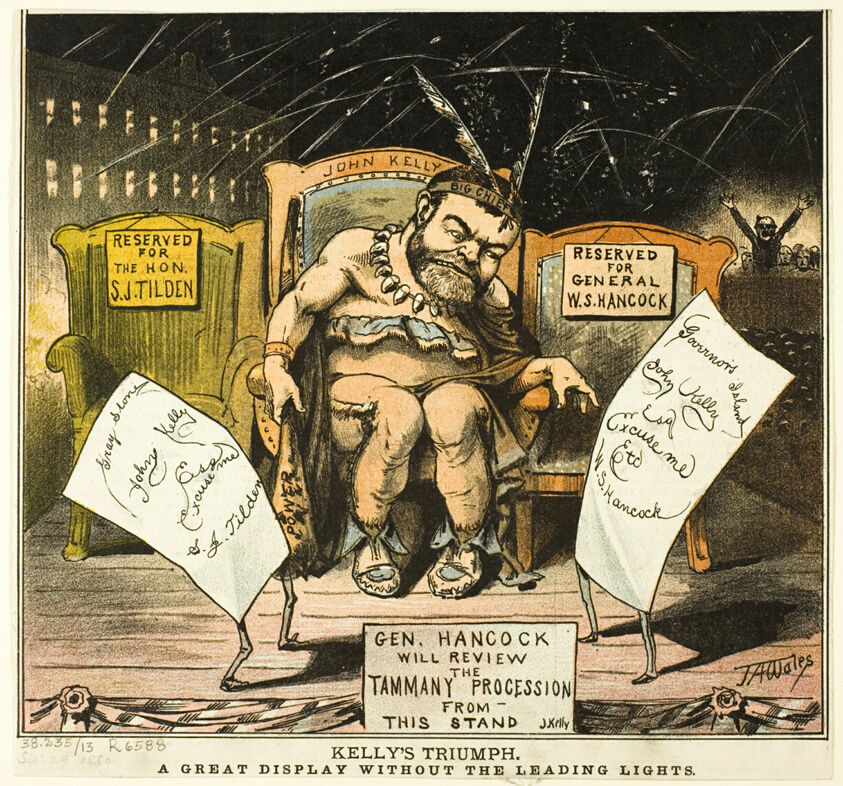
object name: Print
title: Kelly's Triumph, from Puck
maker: James A. Wales (American, 1852-1886)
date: published September 29, 1880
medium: Color lithograph on newsprint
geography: United States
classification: lithograph; print; prints and drawing